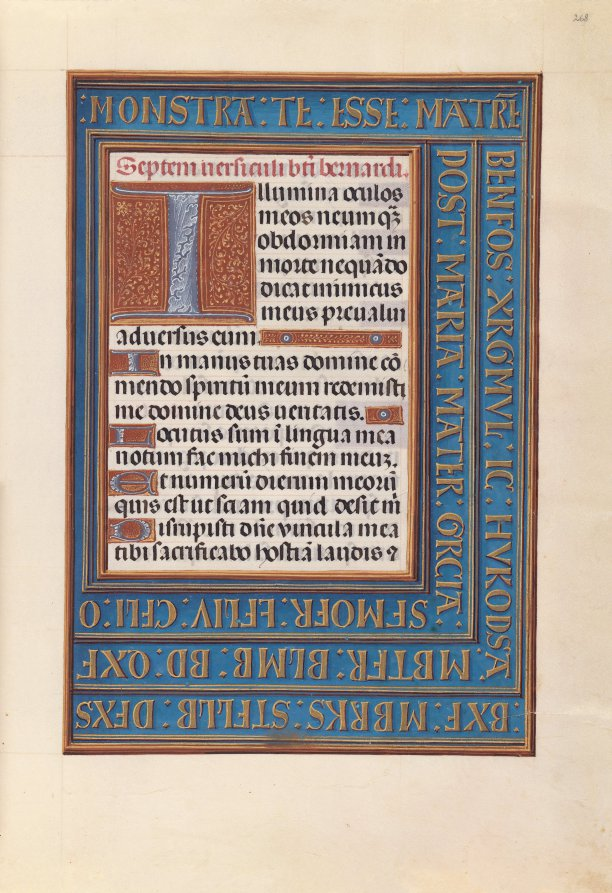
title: Hours of Queen Isabella the Catholic, Queen of Spain: Fol. 268r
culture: Flanders, Ghent and Bruges, late 15th century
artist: Master of the First Prayerbook of Maximillian (Flemish, c. 1444–1519)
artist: and Associates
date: c. 1500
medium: ink, tempera, and gold on vellum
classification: Bound Volume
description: This manuscript was illuminated by a circle of at least five highly organized manuscript painters active in the Flemish cities of Ghent and Bruges. The principal illuminator was Alexander Bening, who painted the majority of the book's miniatures. Manuscripts produced by this circle of artists are renowned for the decoration of their borders, which typically feature a rich variety of realistically-painted flowers, birds, and butterflies. This prayer book, called a book of hours, was intended not for a cleric, but for the private devotions of a lay person-in this case, Isabella the Catholic, Queen of Spain (1451-1504). Isabella's coat of arms embellishes the book's frontispiece. It is unlikely that the book was commissioned by the Queen herself; rather, she probably received it as a diplomatic gift from someone courting her patronage, perhaps Cardinal Francisco Jimenez de Cisneros. A Franciscan friar, Jimenez was dependent upon Isabella for his advancement, first to the post of Queen's confessor in 1492, and then to Archbishop of Toledo in 1495.